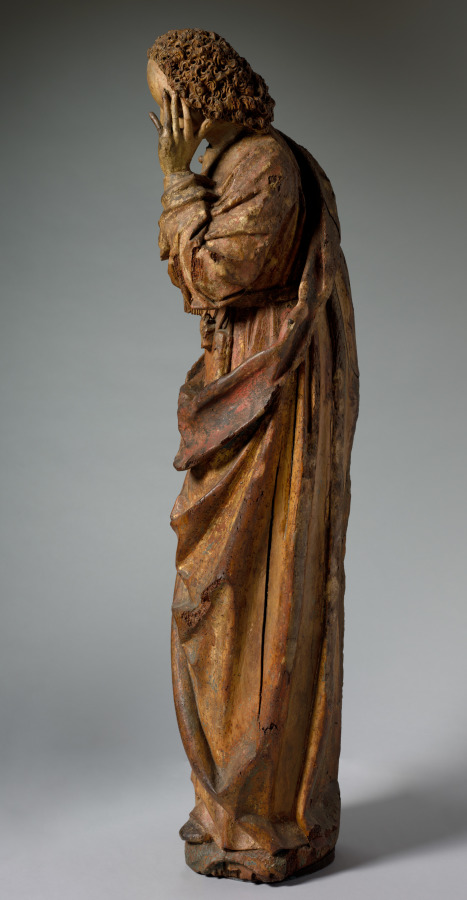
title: Saint John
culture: France, 15th century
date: 1450–1499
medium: wood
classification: Sculpture